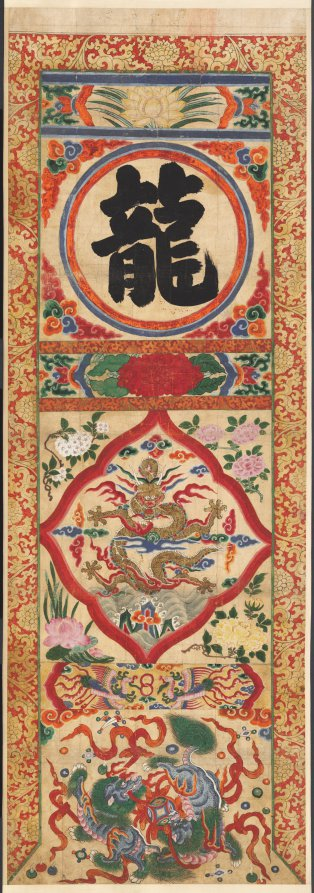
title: Painted Panel of Character "Dragon"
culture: Korea, Joseon dynasty (1392–1910)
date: early 1900s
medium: hanging scroll, ink and color on paper; unmounted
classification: Painting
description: This set of four colorful hanging scrolls may have been used in an outdoor Buddhist ritual to evoke heavenly blessings. Each hanging scroll bears four different characters: tiger, dragon, whistle, and recite. Traditionally, tiger and dragon belong to the four directional guards, respectively west and east.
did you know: This set of four colorful hanging scrolls may have been used in an outdoor Buddhist ritual to evoke heavenly blessings.